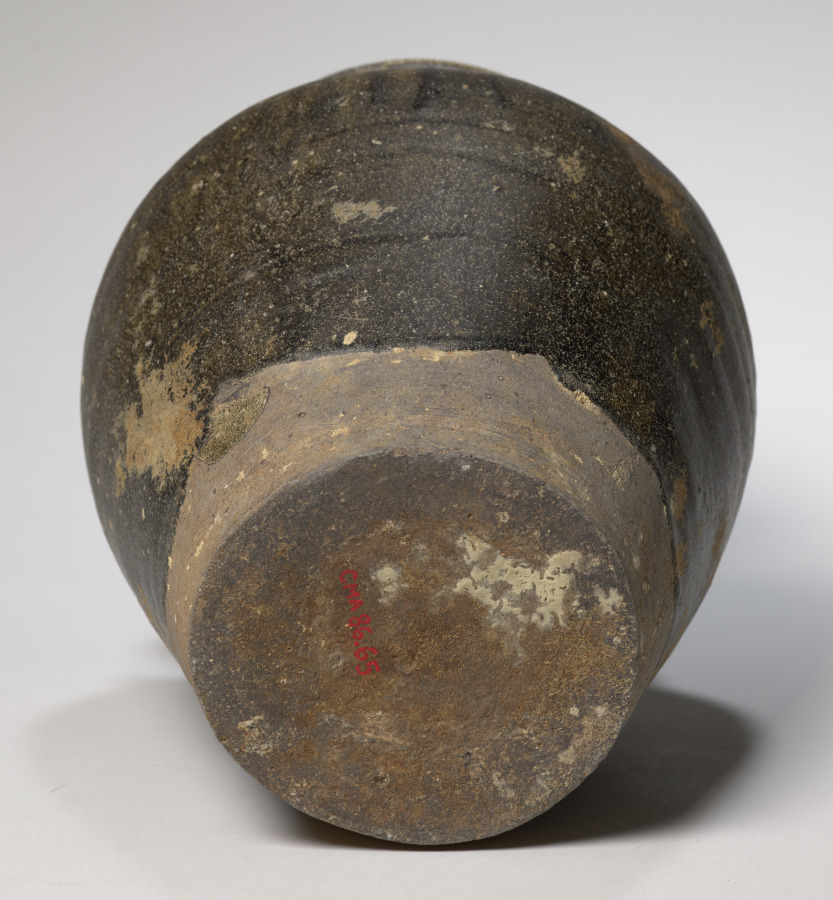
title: Storage Jar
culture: Thailand, Sawankhalok, 14th century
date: 1300s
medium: stoneware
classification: Ceramic